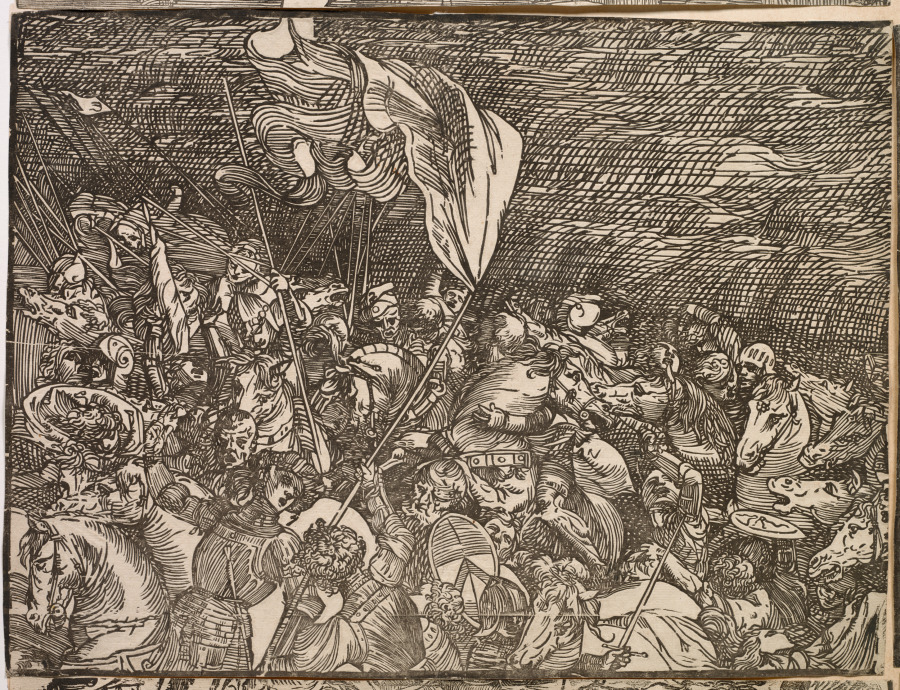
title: The Submersion of Pharaoh's Army in the Red Sea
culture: Italy, Venice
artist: Titian (Italian, c. 1488–1576)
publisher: Domenico dalle Greche (Italian, 1503–1603)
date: 1514–15, printed 1549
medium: woodcut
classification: Print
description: To make this monumental woodcut—considered one of the most ambitious prints of the Renaissance—Titian probably drew directly on the wooden blocks, after which a skilled cutter completed the blocks. The size rivals that of a painting, and the composition would have hung on a wall. Titian’s bold vision presents nature as a vehicle of God’s mercy and wrath. Moses, at right, having parted the seas for the Israelites to pass, commands them to close over the Egyptian forces (Exodus 14:21–31). Titian propelled the narrative with remarkable unity, dedicating entire blocks to the turbulent sea and rolling clouds that culminate in a magnificent cliff and Renaissance city. Some have interpreted the scene as an allegory of Venice’s troubles with the League of Cambrai, a military alliance that threatened the island city.